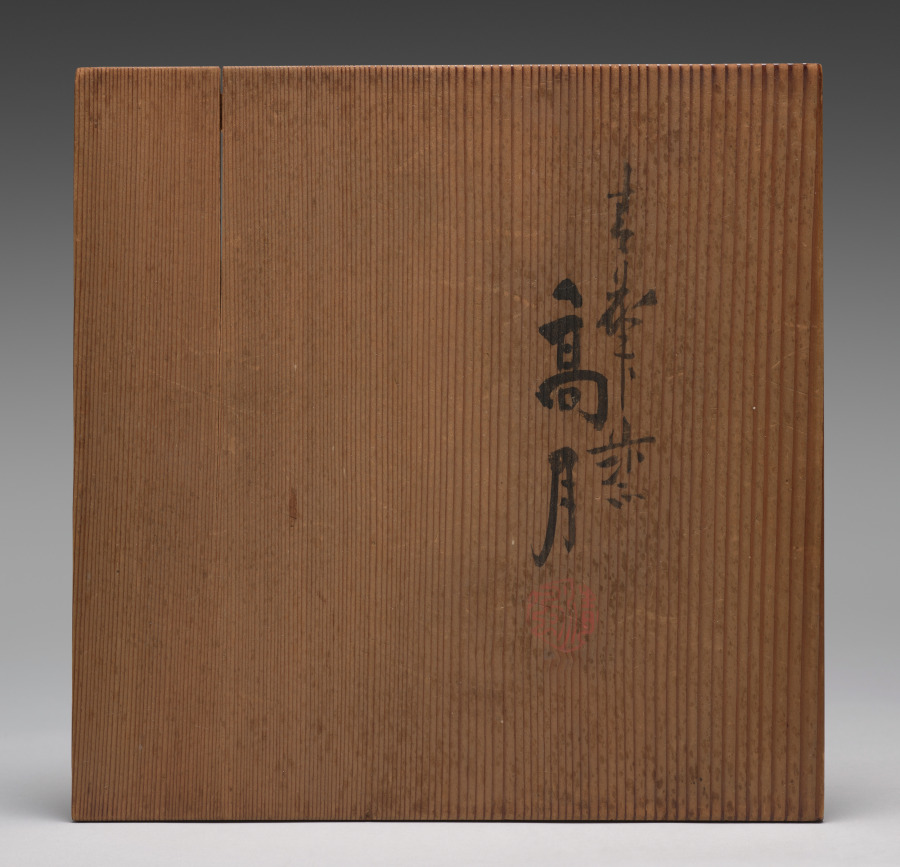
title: High-Footed Bowl with Lotus Pond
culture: Japan, Meiji period (1868–1912)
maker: Seifū Yohei III (Japanese, 1851–1914)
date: 1887–92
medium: Porcelain with underglaze color and modeled designs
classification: Ceramic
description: Seifū Yohei III was the most prominent head of a ceramics studio in Kyoto that specialized in Chinese-style porcelains and especially items for use in sencha (煎茶), or the drinking of steeped-leaf tea with companions. Sencha was popular among the bunjin of Kyoto and Osaka, who often enjoyed it as part of their emulation of Chinese culture. While sencha was by design less formal than the Japanese tea ceremony, it still featured the display of treasured objects. Prized Chinese antiquities were generally unobtainable, so substitutes such as the Gu-Shaped Flower Vase, CMA 2022.224, were much in demand. Bowls for distributing sweets, like this one, were also a staple of sencha gatherings.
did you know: This high-footed bowl simulates exploration of a pond both from underwater and from the sky.